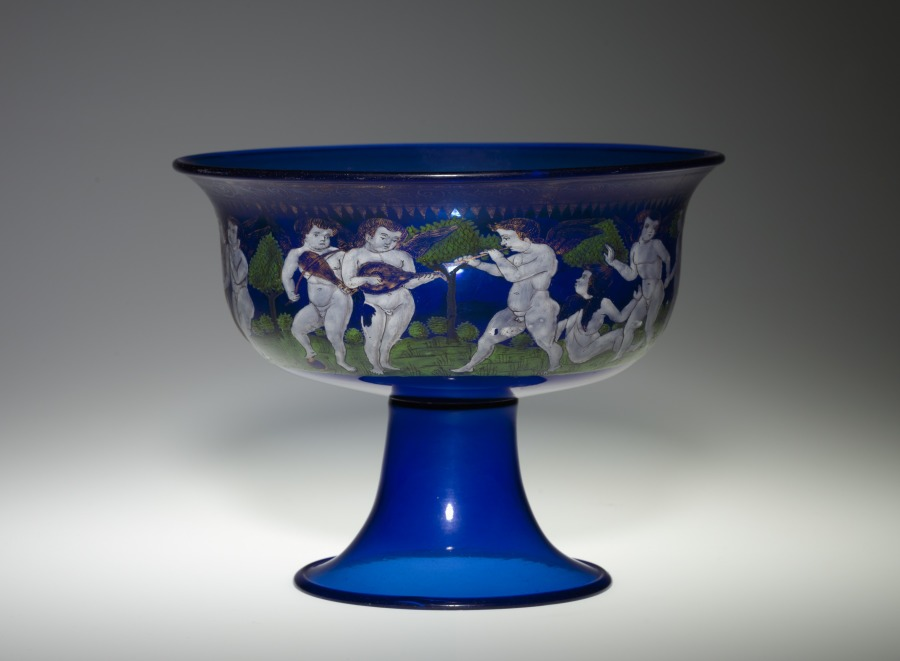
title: Tazza with a Frieze of Putti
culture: Italy, Venice (Murano), 19th century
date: 1800s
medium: enameled blue glass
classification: Glass